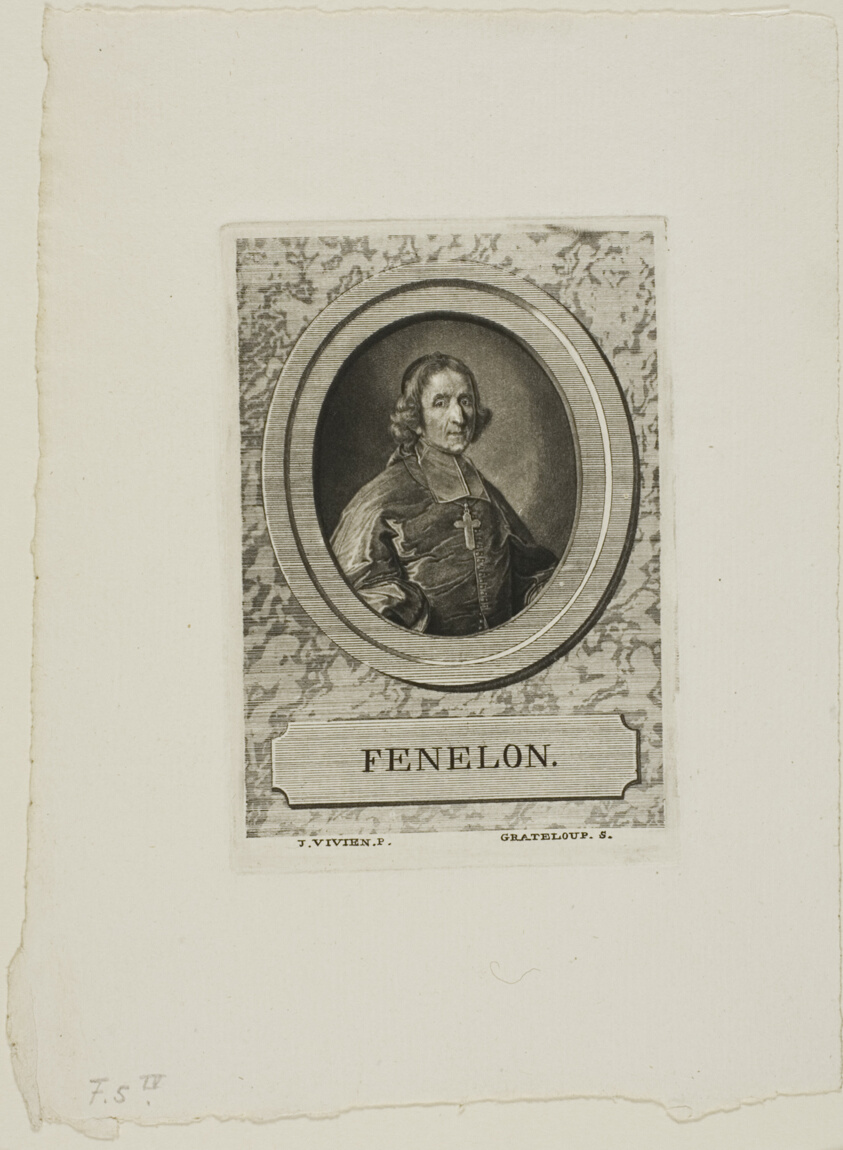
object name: Print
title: Fenelon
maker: Jean-Baptiste de Grateloup (French, 1735-1817)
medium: Aquatint on paper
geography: France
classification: aquatint; print; prints and drawing